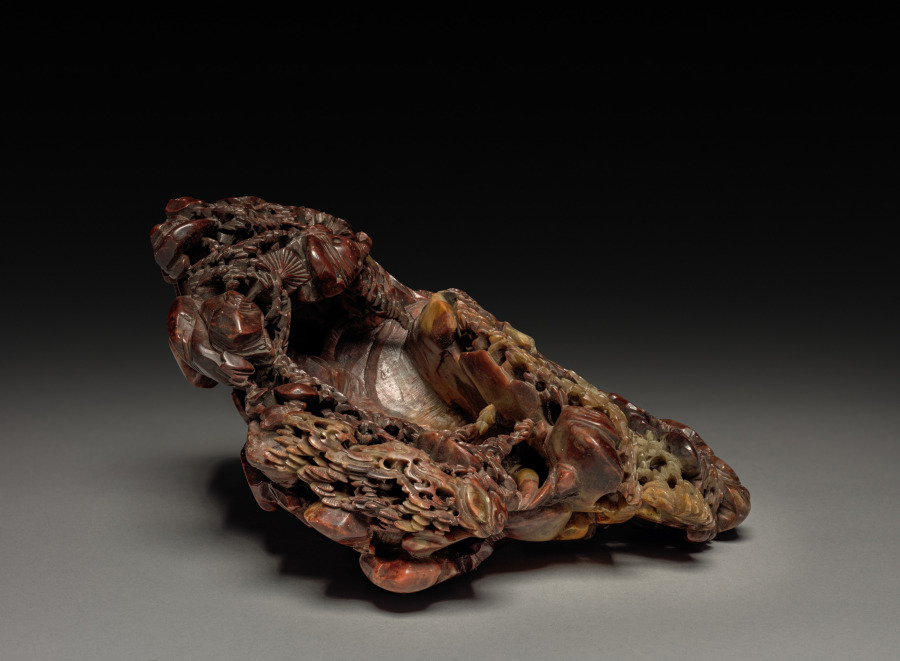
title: Landscape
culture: China, Qing dynasty (1644-1911)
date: 1644–1911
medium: soapstone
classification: Stone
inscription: 石門洞天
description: A mountain scenery surrounded by water and fish is meticulously carved out of soapstone, with a pond, bridge, waterfall, and temple front in its center. The unidentified figure scene on the left includes an ox and a man wearing what appears to be a Korean hat. A Buddha figure hidden in the depth of the temple can be glimpsed from the backside. The inscribed pillar on the right reads “Stonegate Cave to Heaven (shimen dongtian)”. Indentations all over the stone suggest that the miniature mountain was once adorned with precious stones and metal, presumably representing an earthly paradise to which one could escape in one’s mind and imagination.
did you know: A waterfall plummets down the cliff by the temple and then flows smoothly down to join the river at the front of the landscape scene.